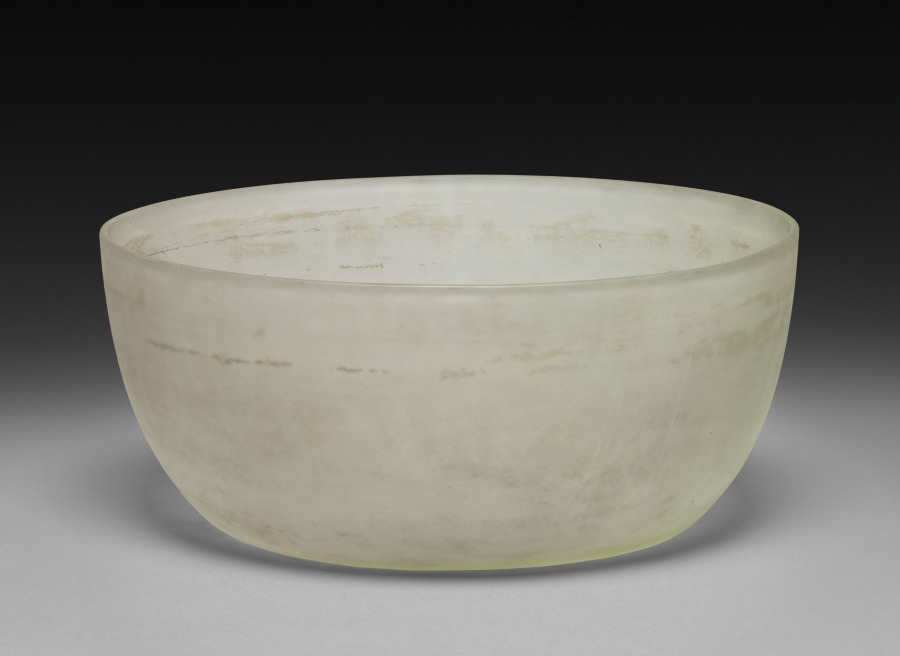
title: Bowl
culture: China, Song dynasty (960-1279)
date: 960–1279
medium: glass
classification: Glass